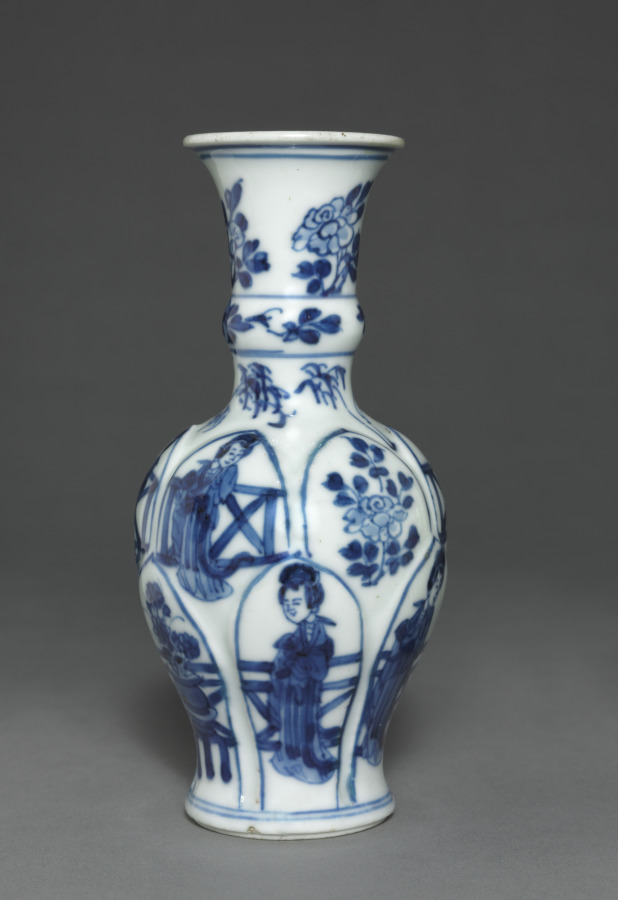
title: Vase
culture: China, Qing dynasty (1644-1911), Daoguang reign (1821-1850) - Xianfeng reign (1851-1861)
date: 19th Century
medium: porcelain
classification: Ceramic